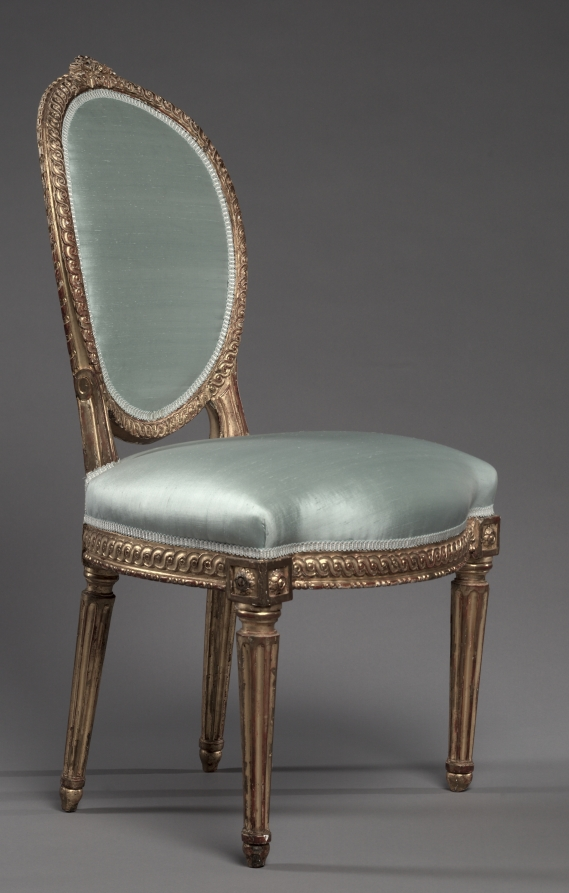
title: Side Chair (2 of 2)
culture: France, style of Louis XVI, 18th century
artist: Jean Baptiste fils Lelarge (French, 1743–1802)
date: 1700s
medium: gilded wood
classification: Furniture and woodwork